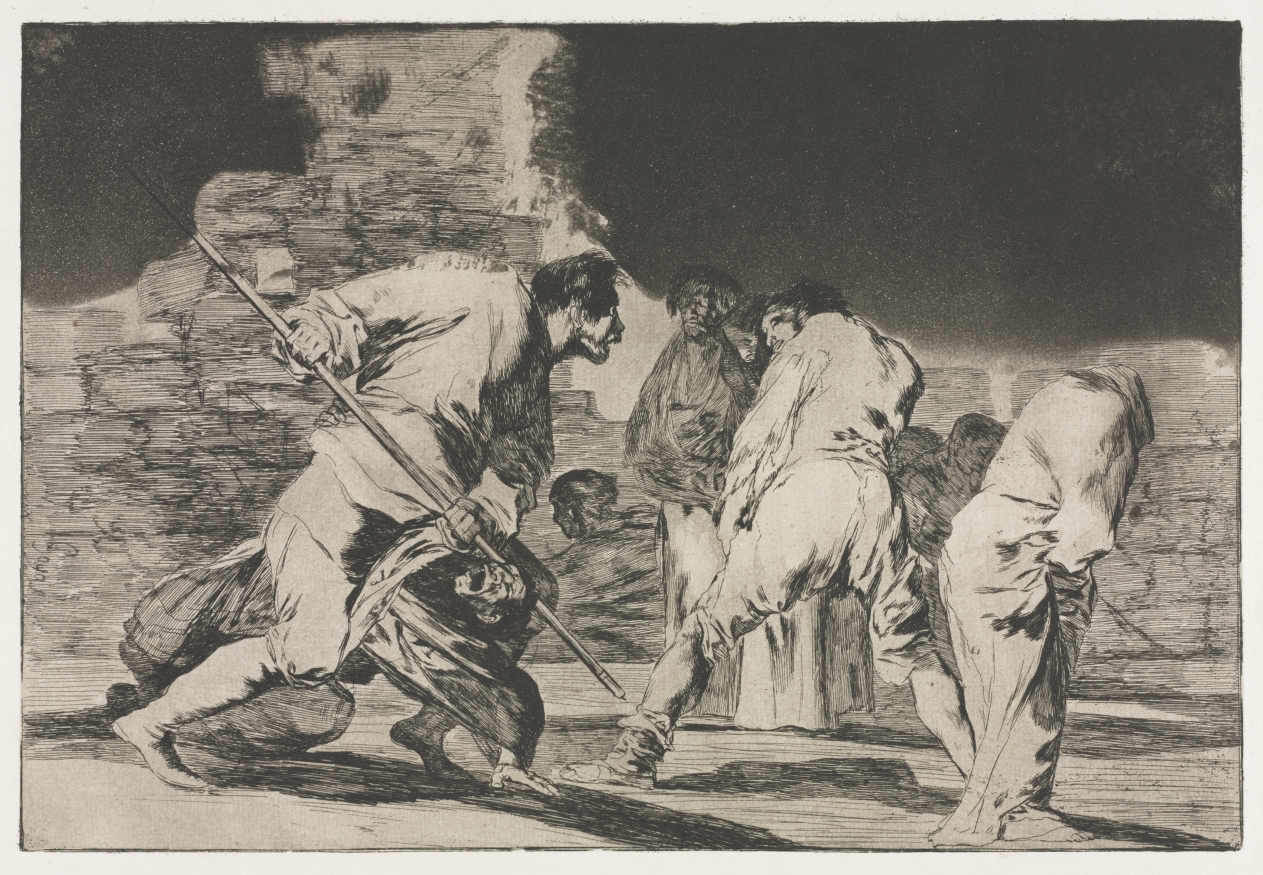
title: The Proverbs: The Folly of Fury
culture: Spain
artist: Francisco de Goya (Spanish, 1746–1828)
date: 1864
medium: etching and aquatint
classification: Print